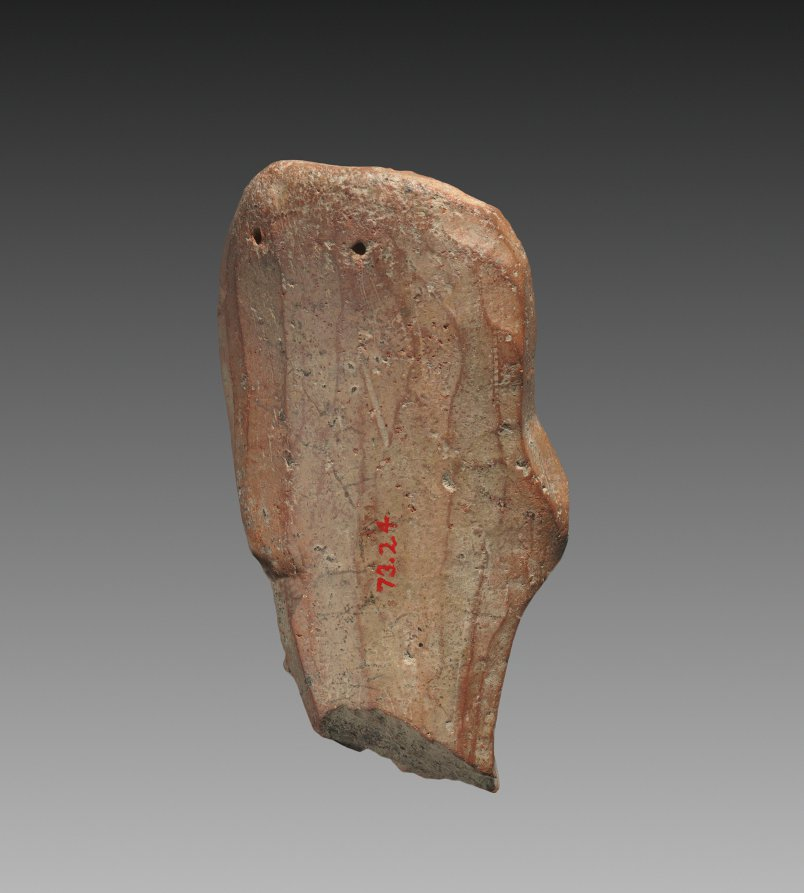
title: Female Figure, Probably a Nature Divinity (Yakshi)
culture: India, Shunga period (185–78 BCE)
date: c. 75 BCE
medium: terracotta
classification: Sculpture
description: This powerful female figure, softly modeled with full volumes, is heavily adorned with jewels and flowers. In her right hand she grasps a fruit and her left rests on her hip. A sense of movement is achieved through her raised left leg, curving pleat lines, swinging beads of her necklace, and her turning head.